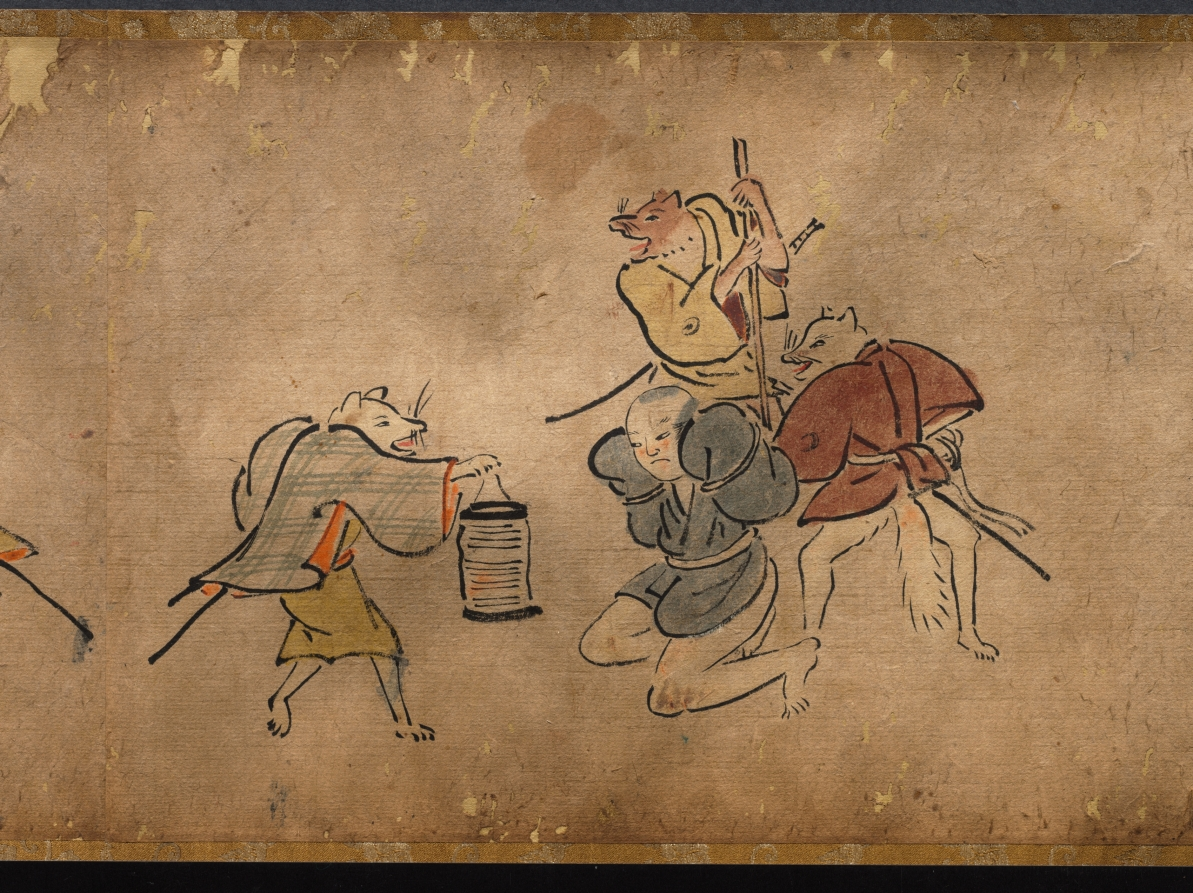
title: The Illustrated Tale of Oishi Hyōroku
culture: Japan, Edo period (1615–1868)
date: 1700s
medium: handscroll; ink and color on paper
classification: Painting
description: This incomplete handscroll illustrates part of the story of Oishi Hyoroku, a young man tasked with battling fox apparitions who were creating problems in his town. In other extant versions of the scroll, the story is set in the fall of 1624 in Kagoshima in southern Japan. Throughout the story, Hyoroku is tricked and terrified by the foxes that shift their shapes into a variety of monstrous phantoms. After repeated humiliations, he eventually captures two of the foxes. In this version, colloquial texts that function like text blurbs in comics appear throughout the scroll, but the main text is missing.